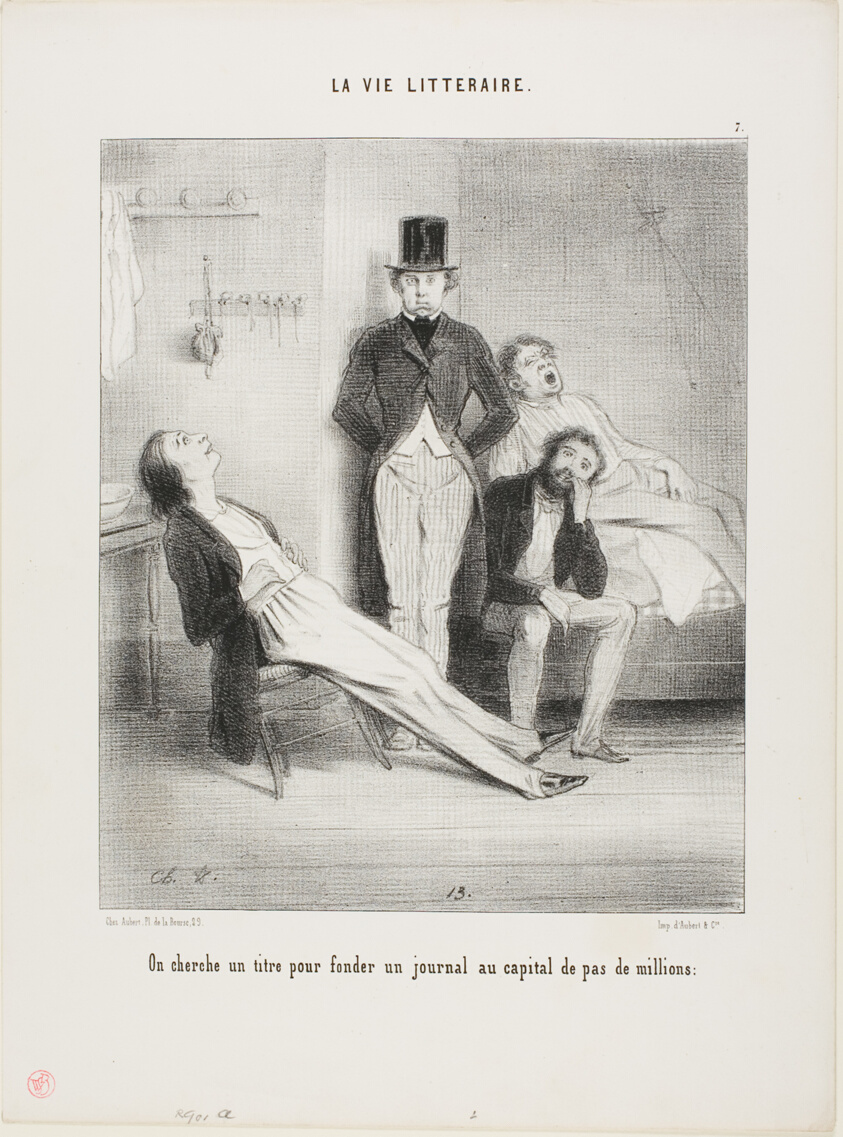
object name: Print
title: The Literary Life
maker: Charles Vernier (French, 1831-1887)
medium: Lithograph in black on ivory wove paper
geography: France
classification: lithograph; print; prints and drawing